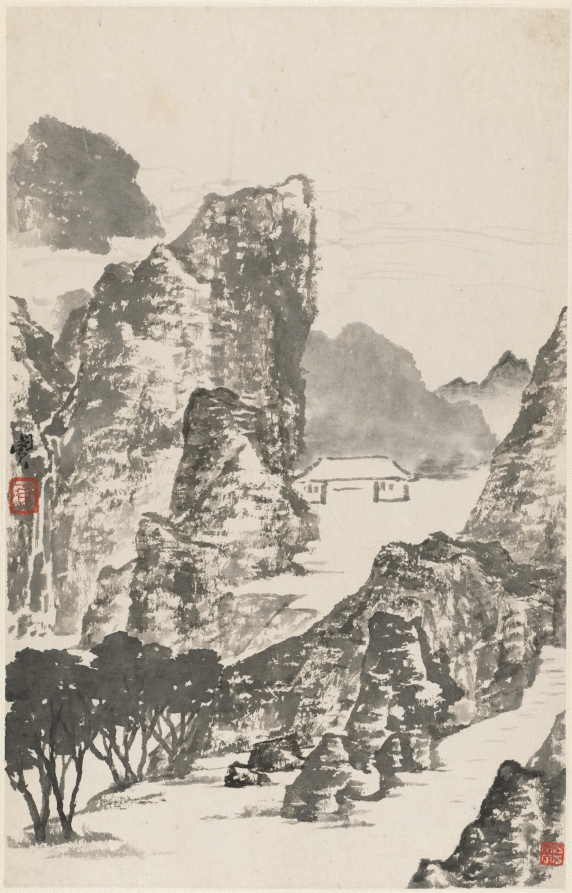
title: Landscape after Mi Fu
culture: China, Qing dynasty (1644-1911)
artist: Min Zhen (Chinese, 1730–after 1788)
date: 1788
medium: album leaf, ink on paper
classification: Painting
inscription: Inscription by Min Chen on the last leaf: I have a habit of collecting strange rocks. My friend Tai-li shan-jen* treasures my paintings as much as I treasure strange rocks. Once we agreed to exchange what we love with each other. However, my busy activities have kept me from carrying this out. This summer I realized that this strange rock has been sitting in my studio for five years, so I painted this to fulfill my old promise. As a record, I chose the grotesque cliff in the last scene of this twelve-leaf album. Cheng-chai, Min Chen inscribed this on the sixth day of the sixth month [July 9] of the wu-shen year [1788]. * Tai-li shan-jen is Wang Li [tzu: Li-fu] tr. Hou-mei Ishida Six seals appearing on the leaves: Min Chen, Cheng-chai, Ching-ch'iao, Chen, Liao-t'ang, Min Chen chih-yin.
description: Min Zhen, who was orphaned at age 12 and developed an eccentric personality, was trained by Tang Yin (1682–1756), a writer, playwright, and superintendent of the imperial porcelain workshops in Jingdezhen. The connection to him may have enabled Min to stay in Beijing for a decade from around 1773. It is not clear whether he ever resided in Yangzhou, but his style is in many instances reminiscent of that of Yangzhou artist Huang Shen. This album demonstrates Min’s versatility and mature style in the last years of his life.